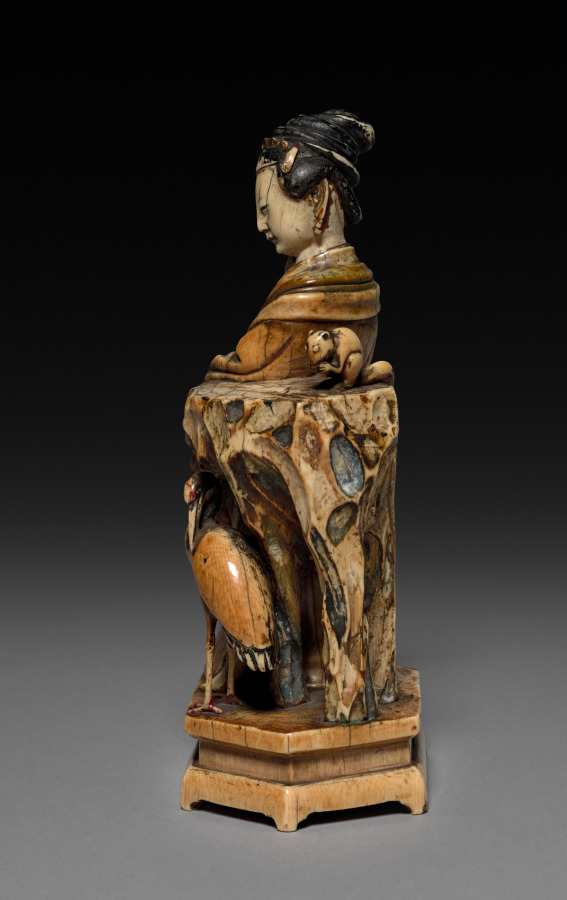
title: Female Figure with Crane and Squirrel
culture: China, Qing dynasty (1644-1911), Kangxi reign (1662-1722)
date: 1662–1722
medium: ivory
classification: Ivory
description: In the Qing dynasty (1644–1911), luxury items became more affordable to larger parts of the society, including women, merchants, and literati in non-official positions. Imperial patronage and a growing urban population encouraged consumption of luxury goods and local craftmanship. This ivory form of a woman with a crane illustrates the superb skills and the creative mind of the talented artisan who sought clients on a competitive market.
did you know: The ivory has aged to a rich amber, while traces of its original red and green paint remain on the woman’s cuffs and collar.